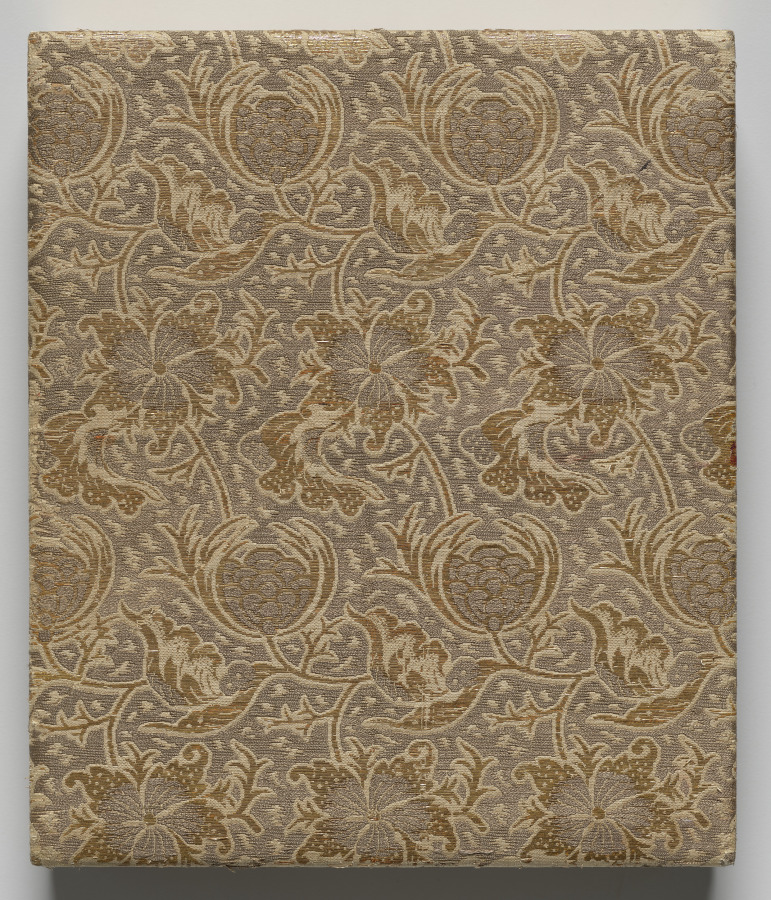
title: Album of Illustrations for the Tale of Genji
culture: Japan, Edo period (1615–1868)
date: 1600s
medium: Double-sided accordion-style album of 17 leaves; ink, light color, and gold on paper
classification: Bound Volume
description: This album contains illustrations for the classic literary work the Tale of Genji, authored in the 1000s by Murasaki Shikibu, an aristocrat of the Heian period (794–1185) court. The scenes are painted in the “white drawing” (hakubyō) mode, in which a fine ink line is used to depict figures and spaces with great subtlety, punctuated only occasionally by traces of red pigment for a character’s lips, a detail of a garment, or a decorative element. These two scenes illustrate episodes from the chapters “Thin Veil of Cloud” (Usugumo) and “Barrier Gate” (Sekiya).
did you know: The illustrations are identified by chapter title in cartouches to the upper right of the paintings.